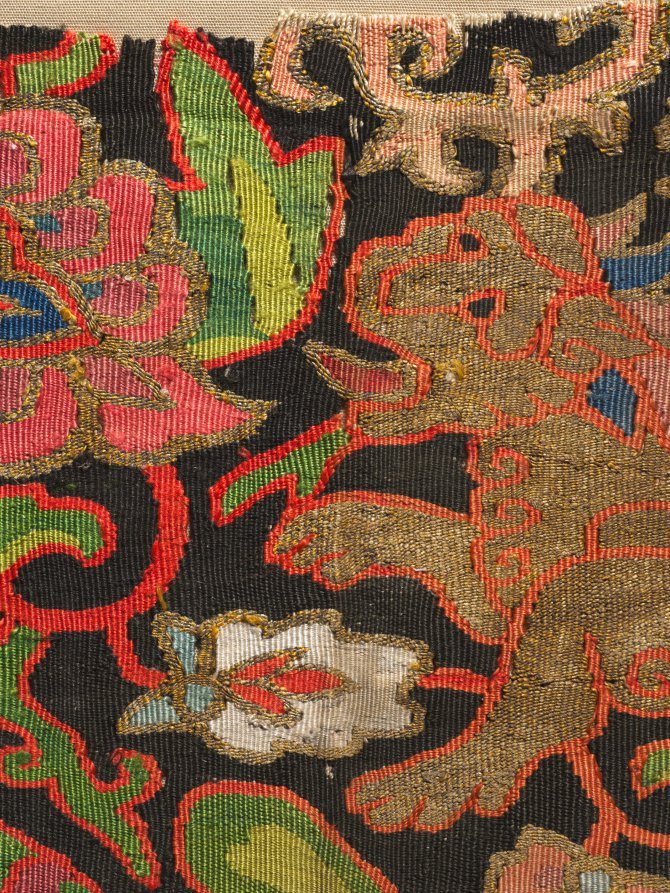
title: Tapestry with golden lions and palmettes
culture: Central Asia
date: 1200s or earlier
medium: silk, gold thread; tapestry weave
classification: Tapestry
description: This reversible tapestry (kesi) fragment, woven with silk and metal thread, is a section from yardage likely intended for a garment, but no contemporary paintings exist to confirm this. A fringe of warps and a striped starting edge are preserved at the bottom of this fragment, as is a selvage along the left edge. Iranian golden lions, traditional symbols of royalty, are depicted amid large palmette leaves on vines. This kesi is different from other Central Asian silk kesi in the repetition of lions and palmettes in horizontal rows, facing alternate directions in an asymmetrical Chinese-inspired layout. But the depiction of lions with parted manes and tilted heads dates from the Sasanian dynasty of Iran (226–637 CE). The palmettes are common to both the Iranian world and Central Asia. This kesi may have been woven by Uyghurs living in the vicinity of Khotan, where the influence of Iranian culture was strong.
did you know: Dye analysis has been done on some of the colored yarns in this fragment. The orange, scarlet, and pink dye comes from the safflower plant, the red and darker pink dye from the bark of a small evergreen tree called the China brasiliensis, and the blue dye from the indigo plant.